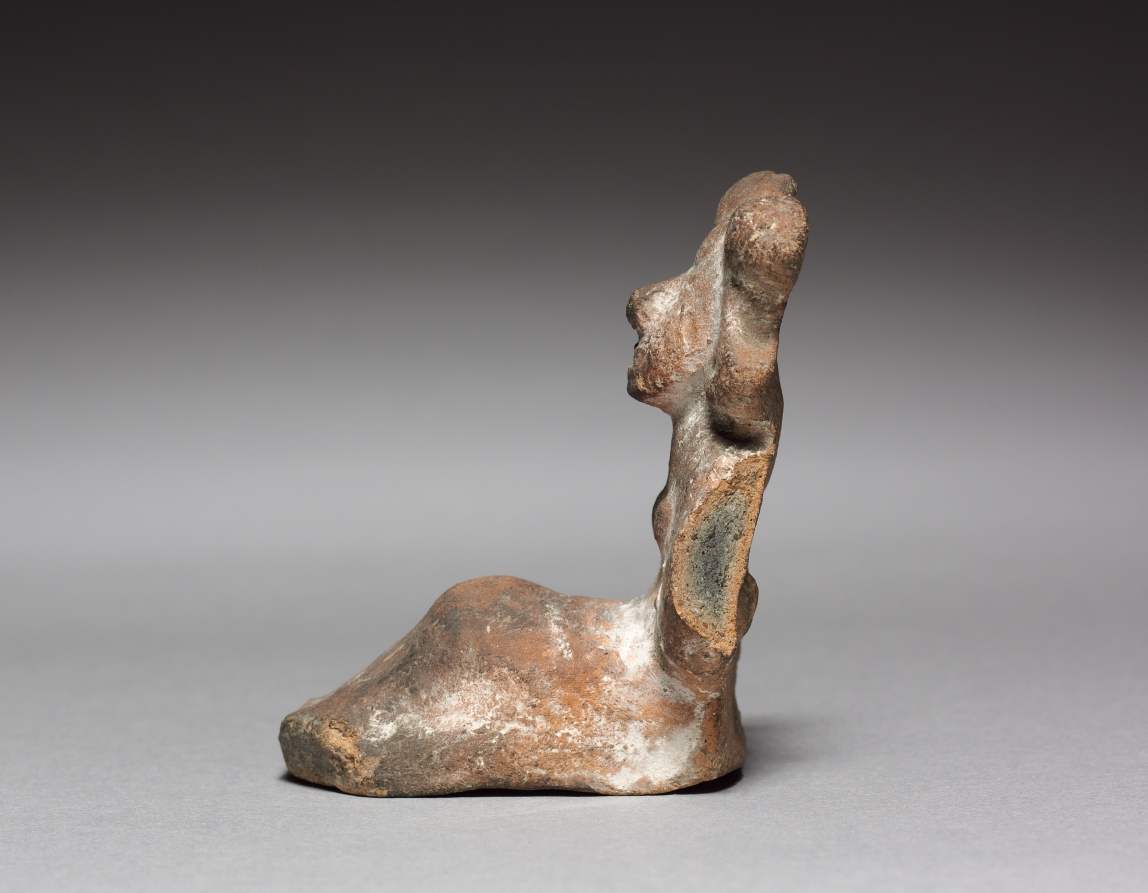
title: Figurine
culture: Mexico, Aztec, 14th century-16th century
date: 1325–1521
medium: terracotta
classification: Ceramic